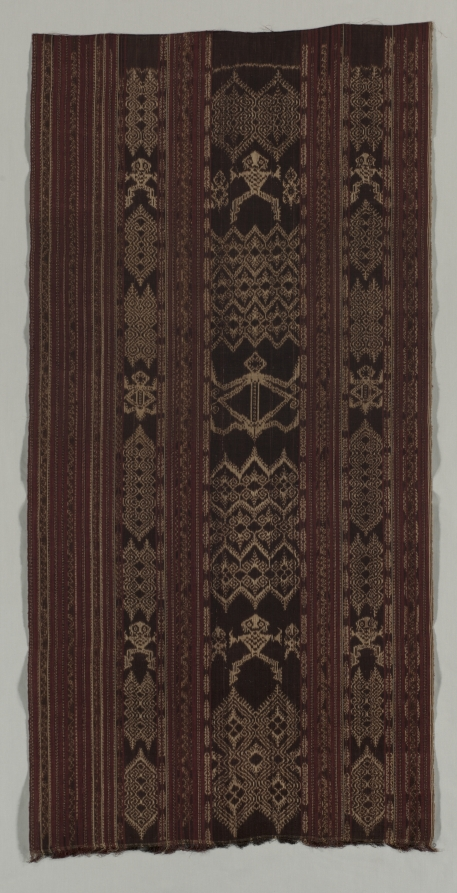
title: Mandaya ikat textile (dagmay)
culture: Philippines, Mindanao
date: c. early 1900s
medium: hemp: plain weave, dyed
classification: Textile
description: This textile is a Mandaya abacá ikat cloth woven in southeastern Mindanao. It is made from hand-stripped abacá fibers that are resist-dyed using the Mandaya ikat technique, in which selected warp threads are tightly bound before dyeing to produce patterned sections during weaving. The designs embody Mandaya cosmology and are traditionally associated with protection, fertility, and the presence of umagad (ancestral spirits).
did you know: After weaving, abacá ikat cloths were soaked in iron-rich river mud, which deepens the browns and blacks, strengthens the fiber, and sets the dyes.